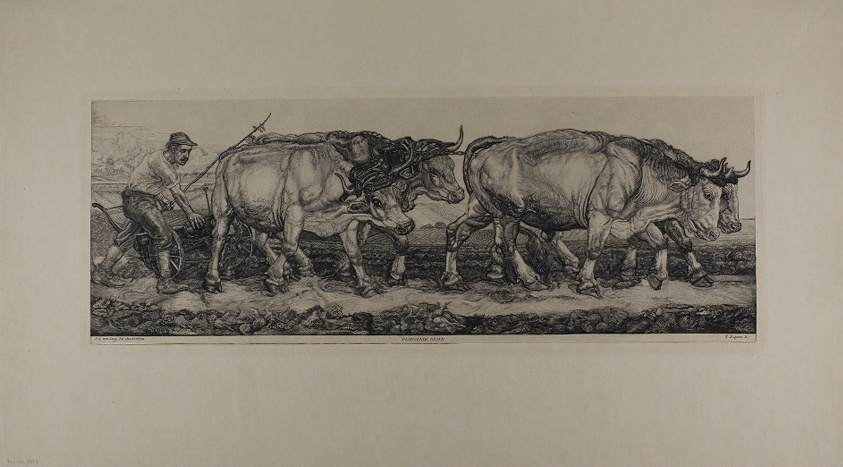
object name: Print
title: Plowing Oxen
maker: Pieter Dupont (Dutch, 1870-1911); published by S. L. van Looy (Netherlandish, active early 20th century)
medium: Etching on paper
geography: Netherlands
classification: etching; print; prints and drawing